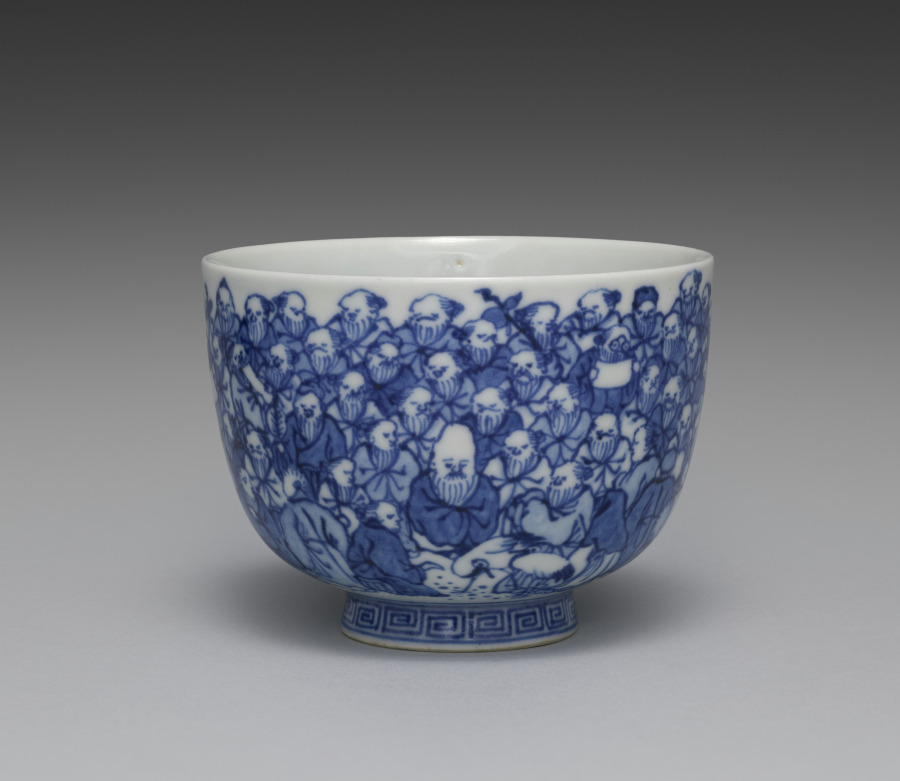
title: Teacup from Teacups with a Hundred Sages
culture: Japan, Meiji period (1868–1912)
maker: Seifū Yohei III (Japanese, 1851–1914)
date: 1893–1914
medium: One from a set of five teacups; porcelain with underglaze blue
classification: Ceramic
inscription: 清風造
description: Each of these five teacups has a painting of identical design in underglaze blue, but as the tiny figures are drawn entirely by hand, each cup has its own personality. The theme of the sencha cups is an assembly of sages or immortals, literally “a hundred venerable [people]” (hyakurō). The myriad figures crowd the scene in groups. The god of longevity, with his tall forehead, sits with his cranes, having flown in from Mt. Penglai on the Isle of the Immortals. Seven long-bearded sages sit around a stone table, chatting and drinking; one is seated on an enormous gourd. Of course, there is a stack of books on the table, and elsewhere, scrolls are being written upon or read—in one case held very close by a sage who is wearing glasses. The design was enormously popular in ceramics made for those engaged in literati culture.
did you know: Seifū Yohei III (1851–1914) produced many works for tea gatherings where people drank Chinese-style leaf-tea (sencha).